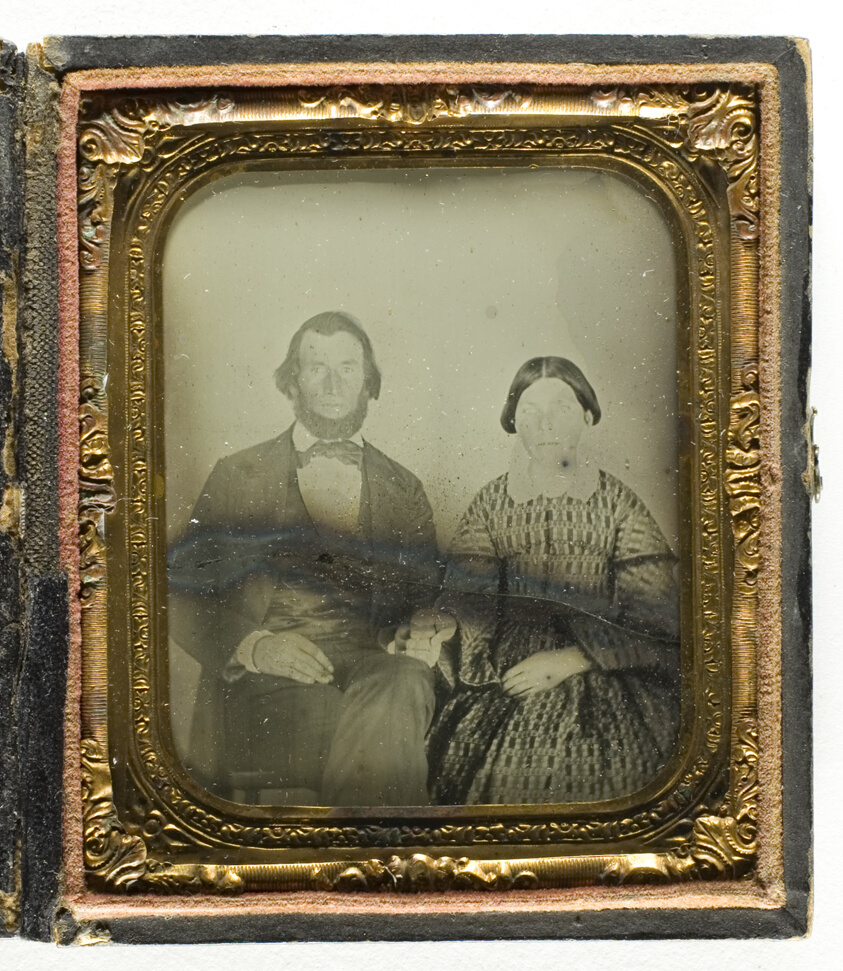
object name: Photograph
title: Untitled (Portrait of a Man and Woman)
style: 19th century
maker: Artist unknown; 19th century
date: 1855/75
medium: Ambrotype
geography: Unknown Place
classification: daguerreotype; photographic process; photography; photograph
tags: portraits, portraits: male subject, photography, portraits: female subject, portraits: multiple subjects